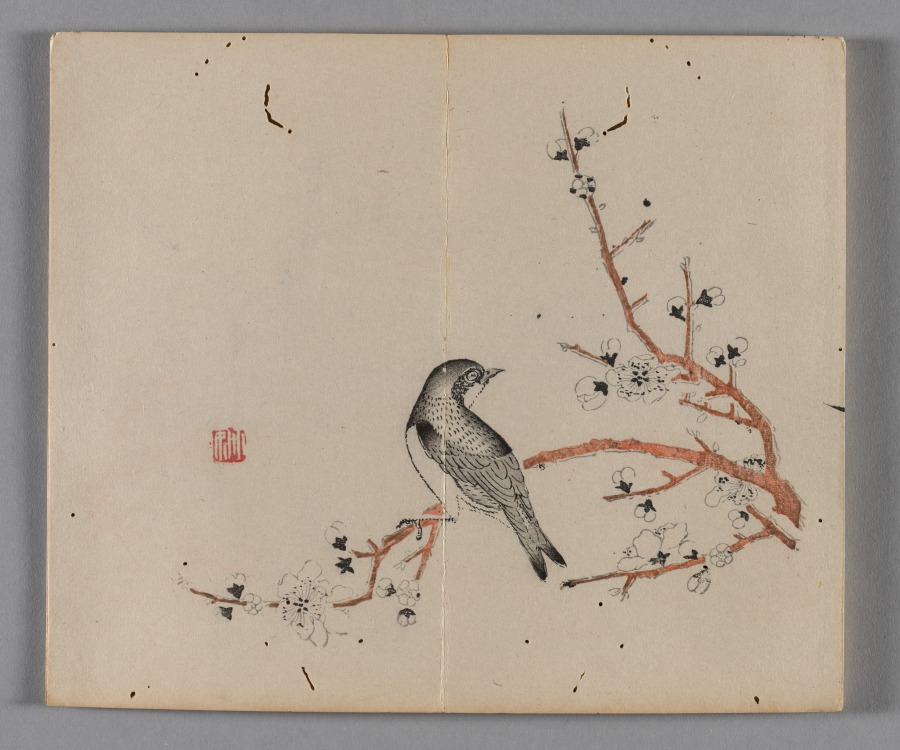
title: Ten Bamboo Studio Collection of Calligraphy and Painting: Miscellaneous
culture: China, Qing dynasty (1644-1911)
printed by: Hu Zhengyan (Chinese, c. 1584–1674)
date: 1633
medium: Woodblock-printed book; ink and colors on paper; first edition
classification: Print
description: Color printing reached a level of perfection in the early 1600s, as seen in this Ten Bamboo Studio Collection of Calligraphy and Painting and the Mustard Seed Garden Manual of Painting (printed 1679 and 1701). The painterly quality, precision in registering (aligning) the woodblocks, and harmonious colors made them the most successful color print editions in Chinese history. Both editions were printed and compiled in Nanjing, spread nationwide, and had a great impact on the arts in Japan and Korea.